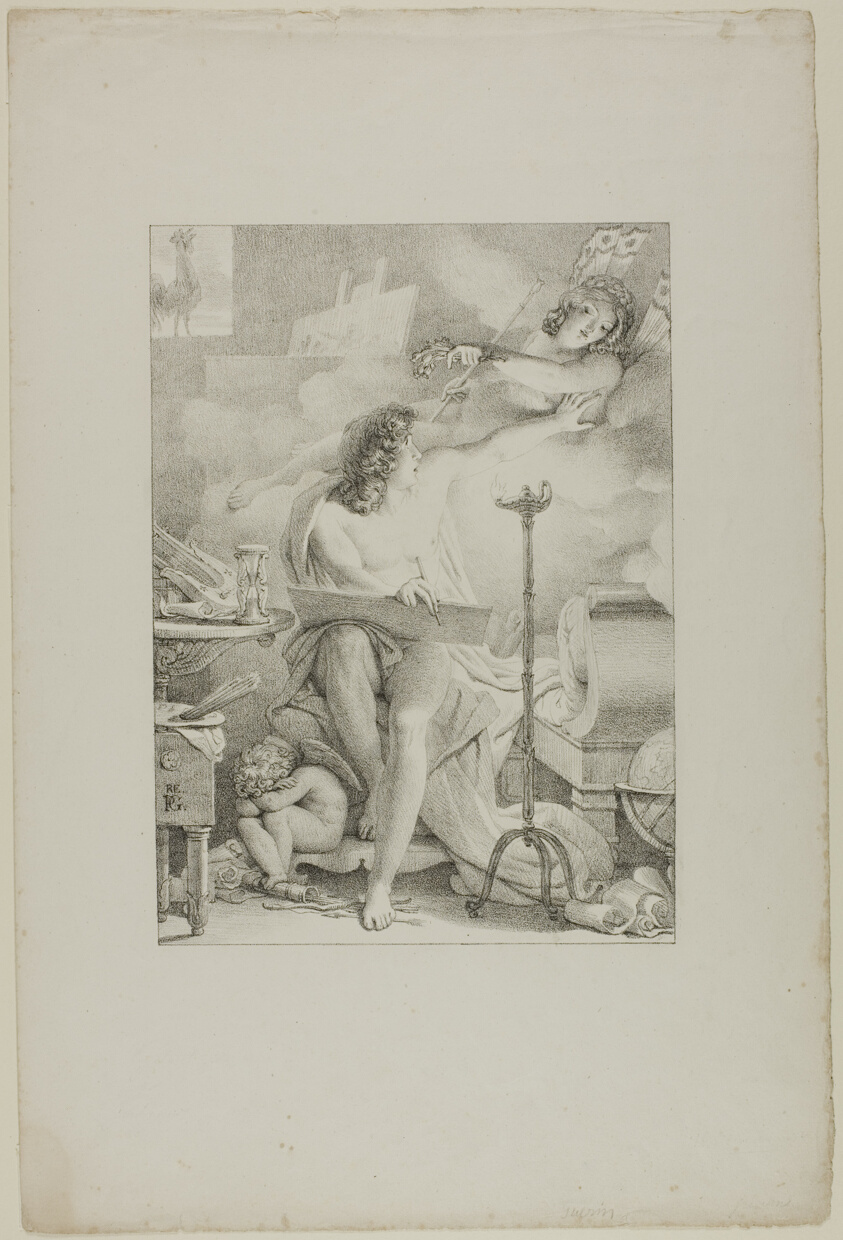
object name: Print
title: The Vigilant Man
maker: Pierre Guérin (French, 1774-1833); printed by Gottfried Engelmann (French, 1788-1839)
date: 1816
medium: Lithograph in black on ivory wove paper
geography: France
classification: lithograph; print; prints and drawing